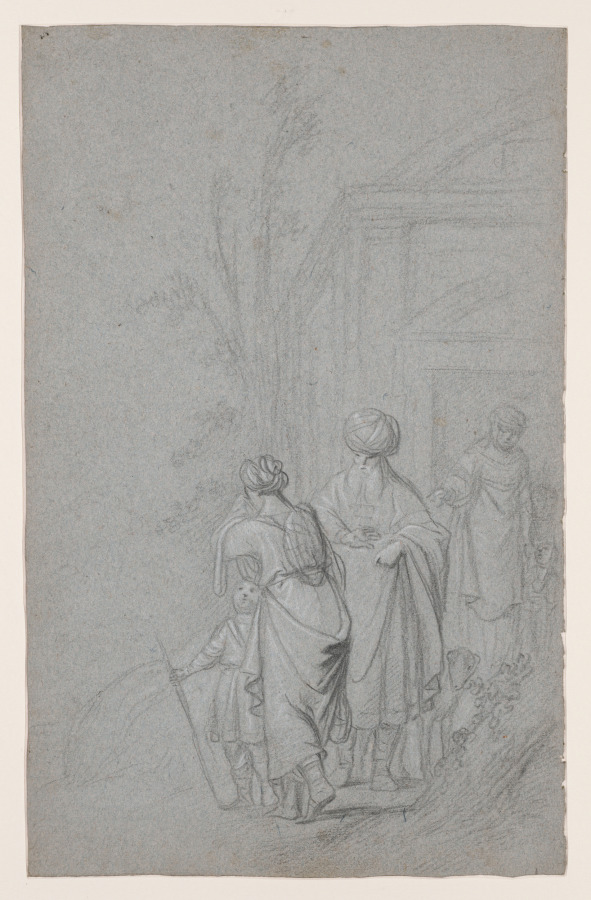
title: Abraham Casting Out Hagar and Ishmael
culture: Netherlands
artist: Pieter de Grebber (Dutch, 1590–1663)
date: c. 1630s–50s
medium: black and white chalks on antique laid blue paper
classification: Drawing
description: In this drawing, the Haarlem artist Pieter de Grebber depicted the Old Testament subject of the handmaid Hagar and her son Ishmael being cast out into the wilderness by Abraham. A popular story in the Protestant Netherlands, its theme played into the society’s emphasis on charity and compassion for immigrants or outcasts. De Grebber focused the scene on Abraham’s dismissive gesture and Hagar’s tearfully wilted form, beautifully rendered with carefully shaded drapery.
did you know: The story of Hagar and her son Ishmael cast into the wilderness seen in this drawing was popular in 17th-century Holland for its emphasis on charity and compassion for immigrants.